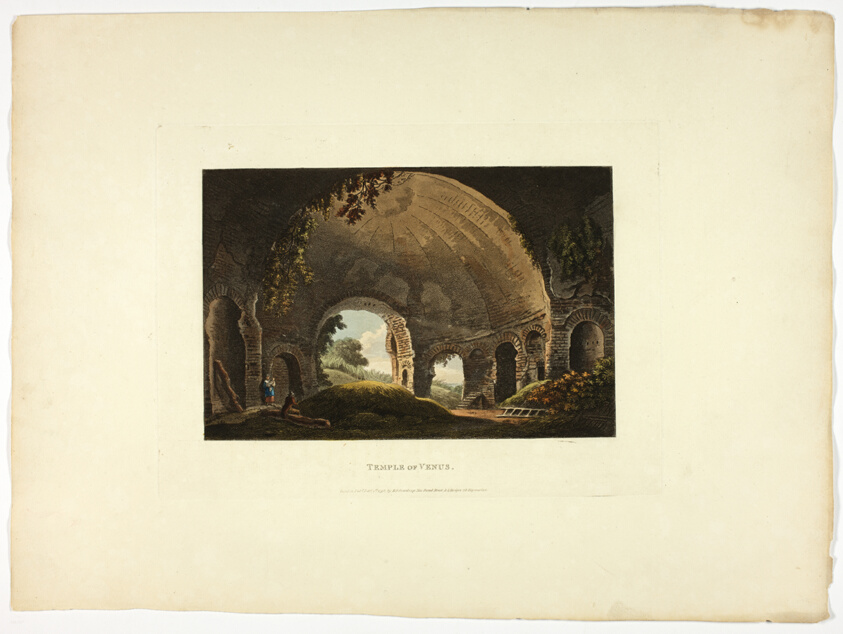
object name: Print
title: Temple of Venus, plate thirty-eight from the Ruins of Rome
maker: M. Dubourg, (English, active 1786-1838); published by J. Merigot (Italian, Unknown)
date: published February 1, 1798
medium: Hand-colored aquatint on paper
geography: England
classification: aquatint; print; prints and drawing